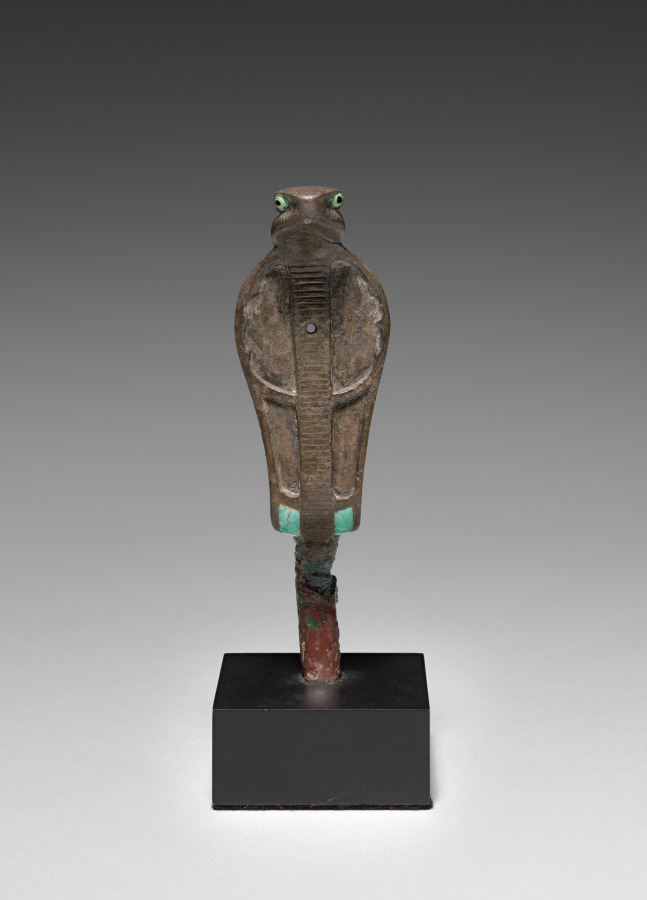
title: Uraeus (Rearing Cobra)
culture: Egypt, New Kingdom (1540–1069 BCE), Dynasty 19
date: 1307–1196 BCE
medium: Silver-copper alloy with inlays (copper, feldspar, turquoise, obsidian?) and gilding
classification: Metalwork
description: Made from a silver-copper alloy, this rearing cobra likely served as a uraeus, symbolizing royal or divine power in ancient Egypt. Its lowermost portion likely fit into the top of the head of a large sculpture, while its body and tail seem cut short, perhaps making room for a solar disk to rise up behind. The eyes are inlaid, and six cavities for additional inlay remain on the expanded hood, the lowermost still intact, the others likely once filled with brightly colored blue and red stone. Much of the remaining surface may once have been gilded, to judge from remaining traces of gold on the back.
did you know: The word uraeus comes from an Egyptian term for “rising/rearing up,” describing the cobra’s position.